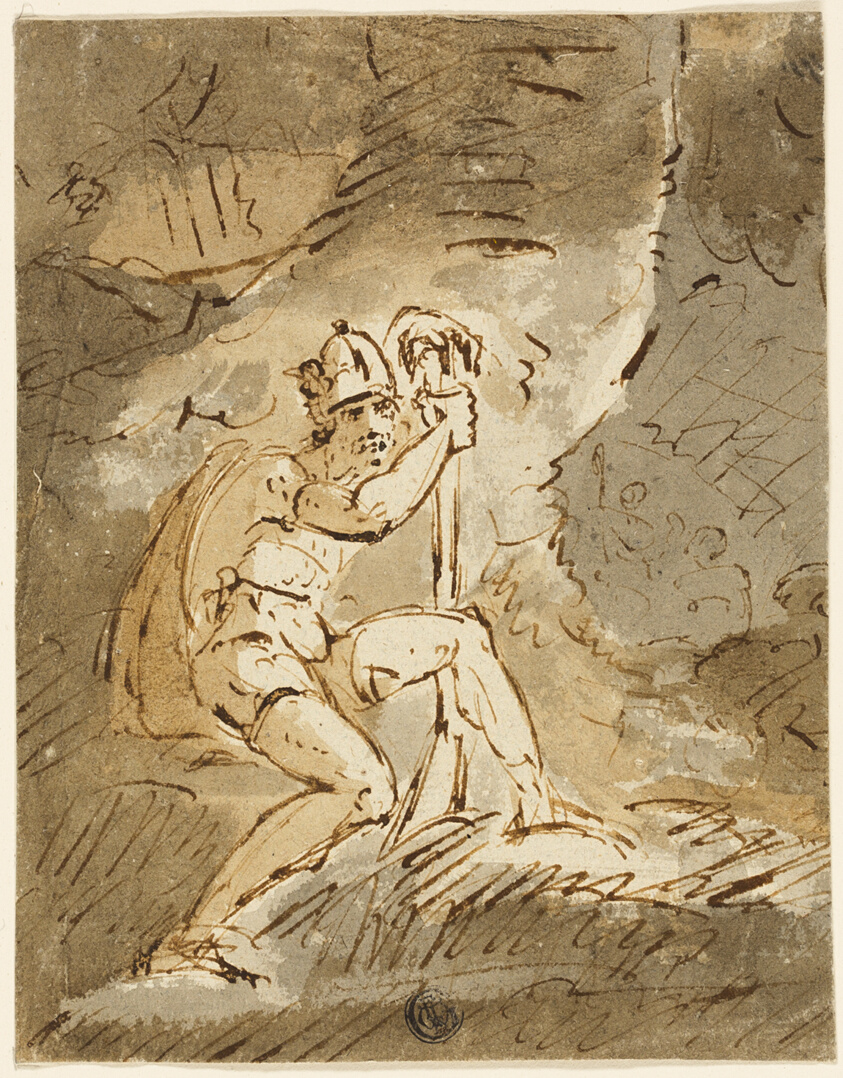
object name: Drawing and Watercolor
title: Helmeted Warrior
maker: John Hamilton Mortimer (English, 1740-1779); or Robert Ker Porter (English, 1777-1842); or John James Stewart (English, 1779-1849)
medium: Pen and brown ink, with brush and brown and gray wash, on gray laid paper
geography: England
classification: pen and ink drawings; drawings (visual works); prints and drawing